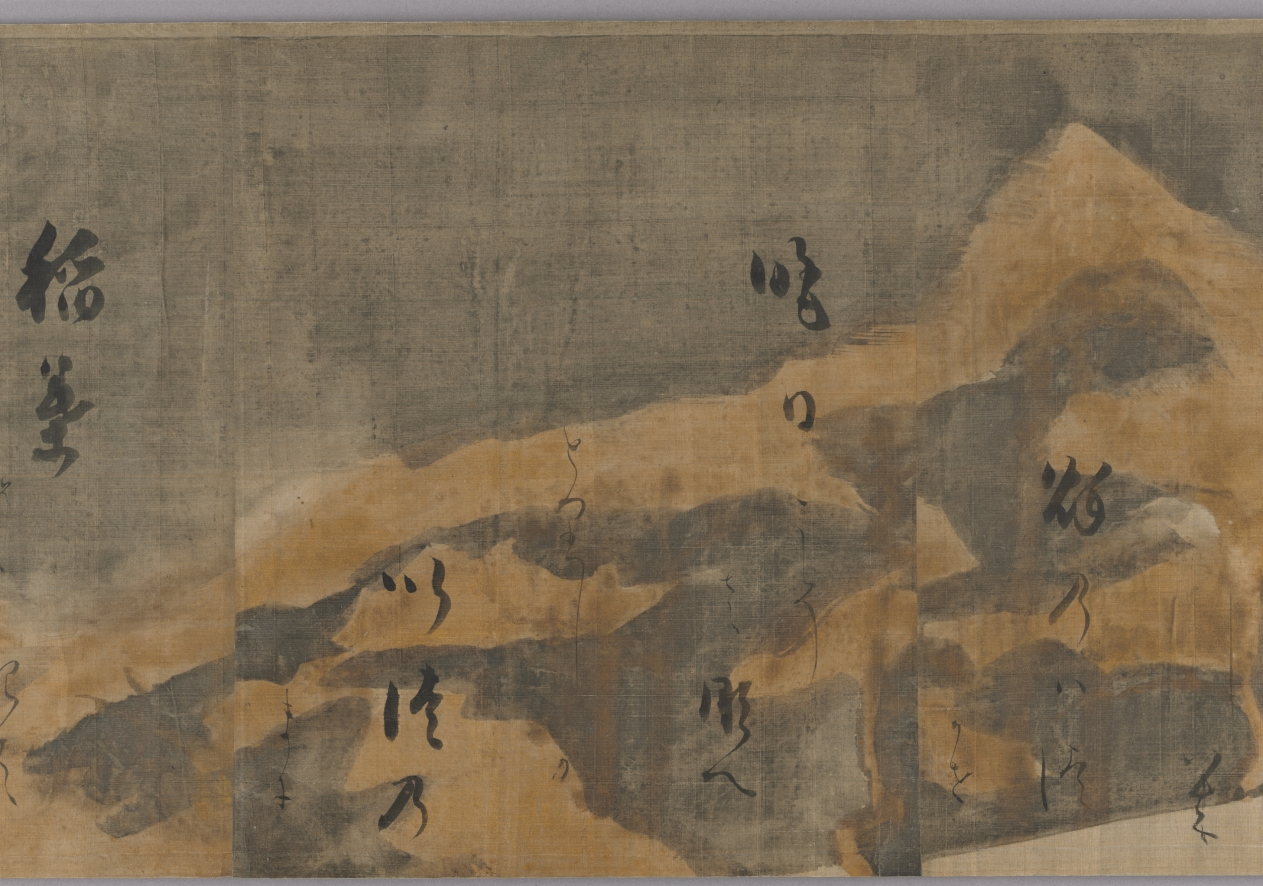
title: Selections from the Collection of Japanese Poems from Ancient and Modern Times (Kokin wakashū) with Design of Pines Along the Shore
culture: Japan, Momoyama period (1573-1615) to Edo period (1615-1858)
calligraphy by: Hon'ami Kōetsu (Japanese, 1558–1637)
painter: attributed to Tawaraya Sōtatsu (Japanese, c. 1570–c. 1640)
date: 1600s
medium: handscroll; ink on silk with gold and silver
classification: Calligraphy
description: The calligrapher and craftsman Hon’ami Kōetsu frequently collaborated with Tawaraya Sōtatsu, a painter who ran a studio that produced fans and screens. Sōtatsu’s work featured abstracted and flattened shapes, fields of color and gold, and asymmetry. In particular, motifs that appeared in small scale, such as flora and fauna, in early decorated Japanese papers were painted in a larger scale—blown up as if seen under a magnifying glass. For this handscroll, Kōetsu brushed poems from the autumn section of a poetry anthology onto silk with a landscape of pines in gold and silver likely painted by Sōtatsu.